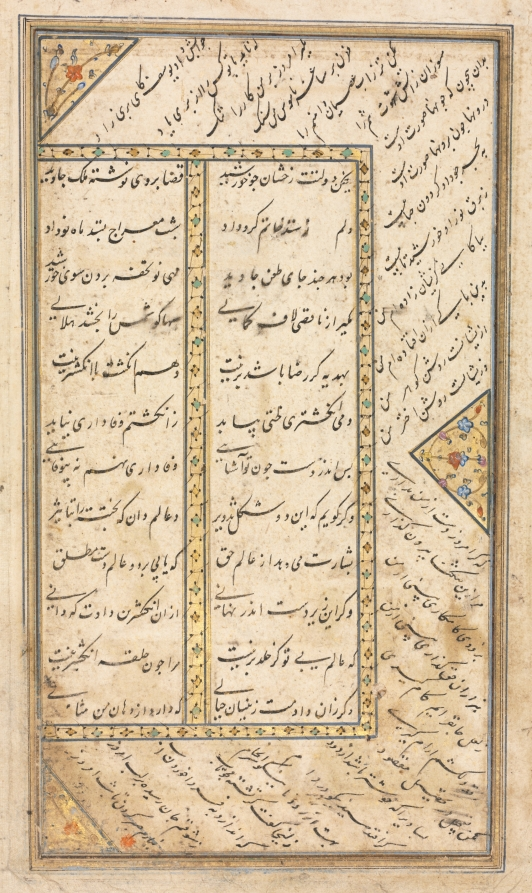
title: Text Page, Persian Verses (verso) in an Anthology with some verses from Haft Awrang (Seven Thrones) of Jami; The Fifth Throne Yusuf and Zulaykha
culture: Iran, Shiraz or Mashhad, Safavid period (1501-1722)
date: mid-1500s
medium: opaque watercolor, ink, and gold on paper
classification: Manuscript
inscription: Script: Nasta'liq